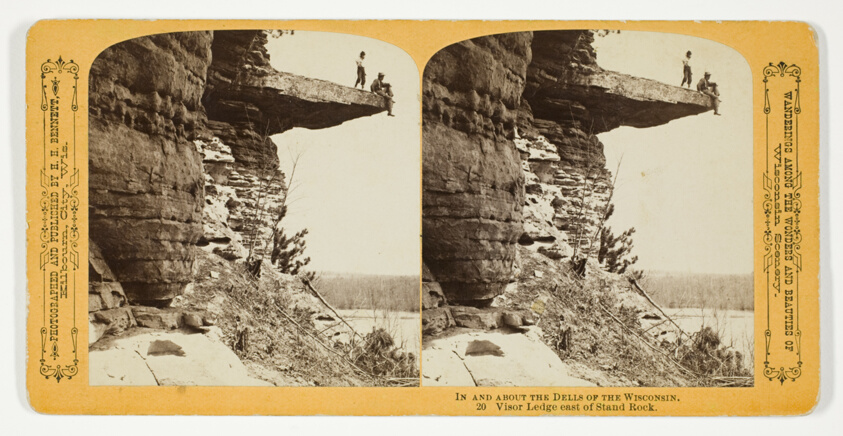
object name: Photograph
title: Visor Ledge east of Stand Rock, No. 20 from the series "In and About the Dells of the Wisconsin River"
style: 19th century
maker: Henry Hamilton Bennett (American, born Canada, 1843-1908)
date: 1870/1908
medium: Albumen print, stereo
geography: Wisconsin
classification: photography; photograph; albumen silver print; stereograph (albumen)